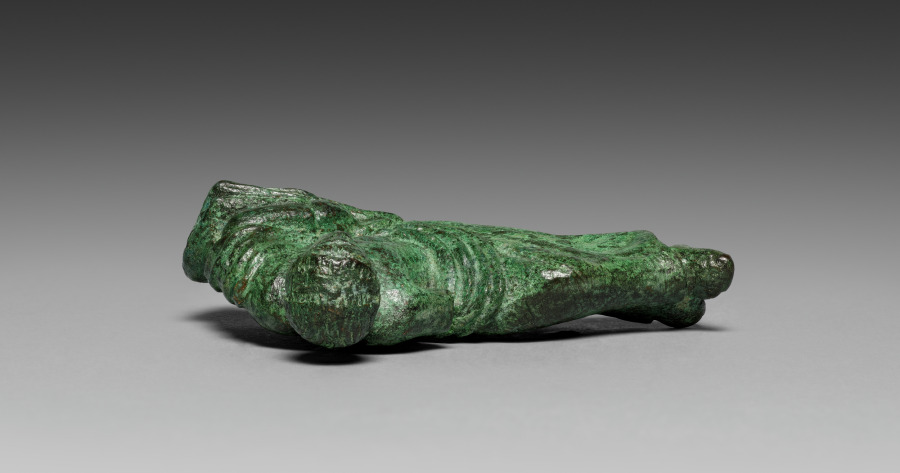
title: Vessel Ornament of Banqueter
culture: Etruscan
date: c. 400–375 BCE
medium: bronze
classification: Sculpture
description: This bronze banqueter figurine was one of six once adorning the rim of a large basin, now lost. Cast in molds with individualized details, most have grooves on their underside to attach to the basin. Minute traces of gilding remain on areas of clothing and skin (mostly visible only under magnification), suggesting that they may have been completely gilded. Two handles in the form of hippocampi, horses with serpentine tails, also belonged to the basin and are now displayed at the Michael C. Carlos Museum at Emory University. The basin may have been used to hold liquid for a banquet, or was perhaps funerary. This bronze figurine lies on his side in the posture of an ancient banqueter. His right arm is broken off but may once have rested on his hip. The figurine wears a garland on his head and a himation draped loosely around his left shoulder, revealing a muscular chest. One leg is raised over the other and a foot is exposed. Specks of gilding remain on the chest and head, but is different in color than that on the other five figurines. Also unlike the others, this one bears a visible seam across its entire length and has no groove underneath.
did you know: This reclining male banqueter demonstrates the posture of symposium guests.